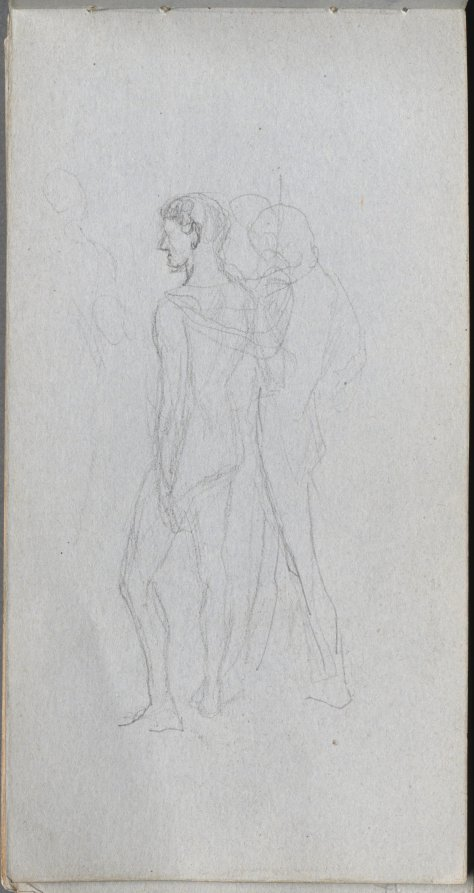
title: Sketchbook, page 92: Two Nudes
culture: France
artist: Ernest Meissonier (French, 1815–1891)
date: c. 1860s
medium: graphite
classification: Bound Volume